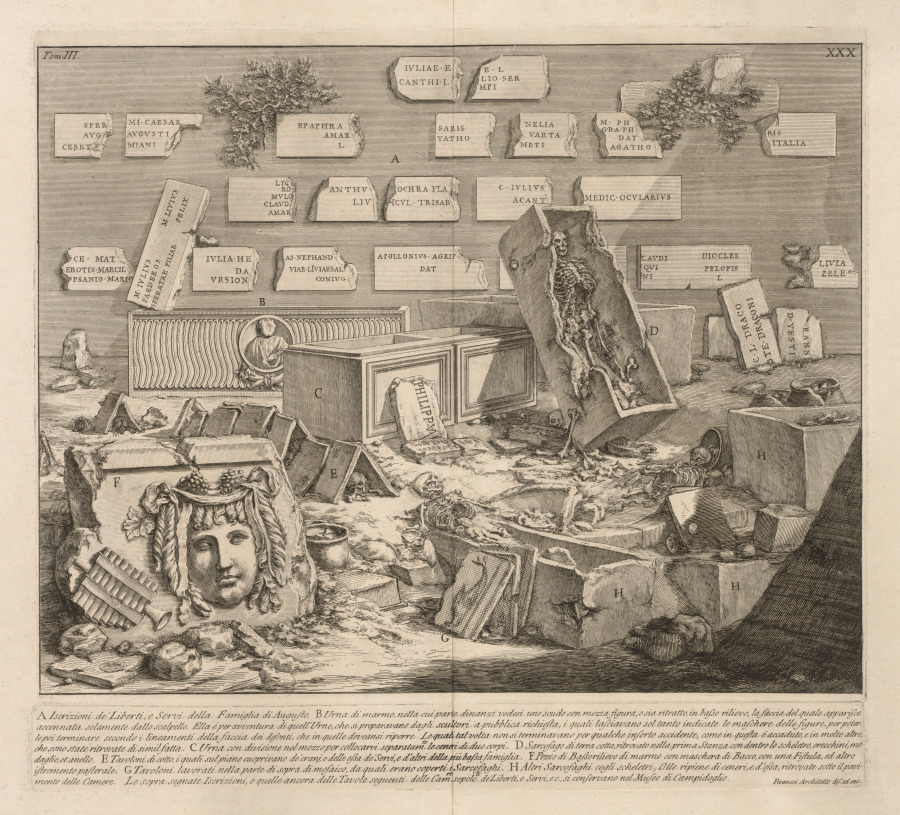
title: Iscrizioni de Liberti e Servi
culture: Italy, 18th century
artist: Giovanni Battista Piranesi (Italian, 1720–1778)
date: c. 1750–56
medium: etching and engraving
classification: Print